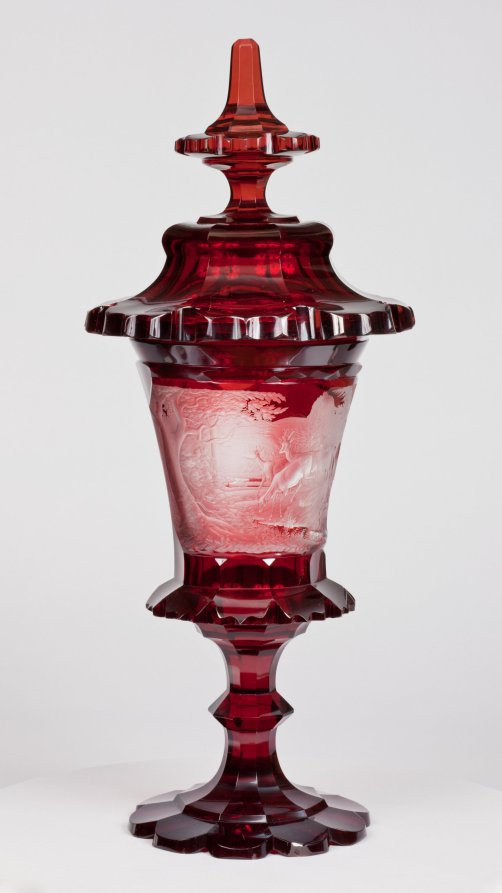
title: Covered Cup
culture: Bohemia, 19th century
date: mid-1800s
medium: ruby glass with engraved decoration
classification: Glass